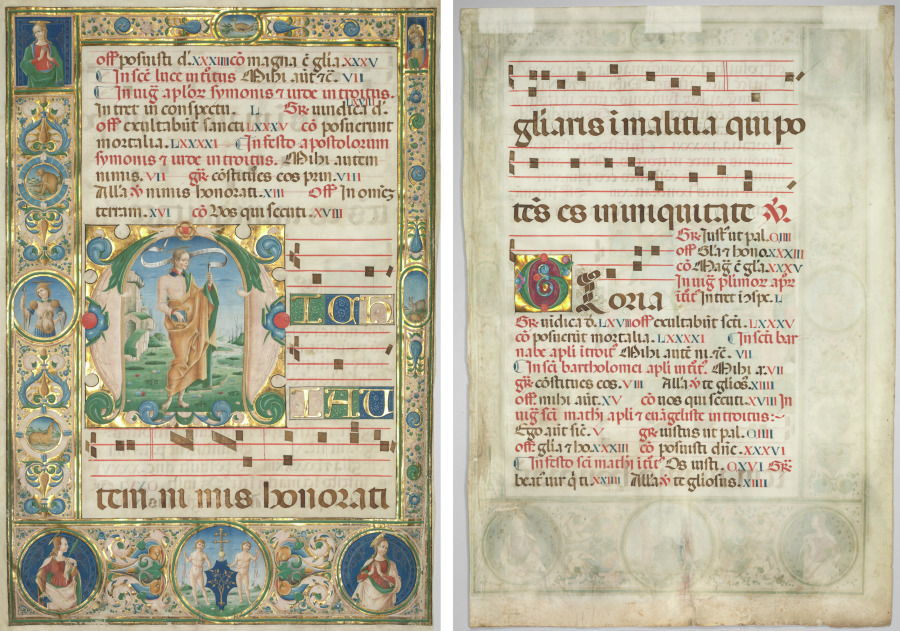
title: Leaf from a Gradual: Initial (M) with St. Andrew (recto)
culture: Italy, Ferrara, 15th century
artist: Jacopo Filippo d' Argenta (Italian, 1501)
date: c. 1480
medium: ink, tempera, and gold on parchment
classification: Manuscript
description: This leaf was excised from a volume of a large set of choral books known to have been commissioned by Bartolomeo delle Rovere for Ferrara Cathedral. Delle Rovere, nephew of Pope Sixtus IV, was the Bishop of Ferrara from 1474 to 1494 and his arms appear in the rondel at the bottom of the page-a shield bearing an oak tree (rovere in Italian) surmounted by a patriarchal cross, the symbol of his rank and authority. Payment records indicate that Argenta worked on the choir books for Ferrara Cathedral from 1478 to 1486. The initial M introduces the chant for the Introit (introduction) to the mass for the Feast of Saint Andrew, celebrated on November 30. This date also marks the beginning of the Advent season (leading to Christmas) in the liturgical calendar.